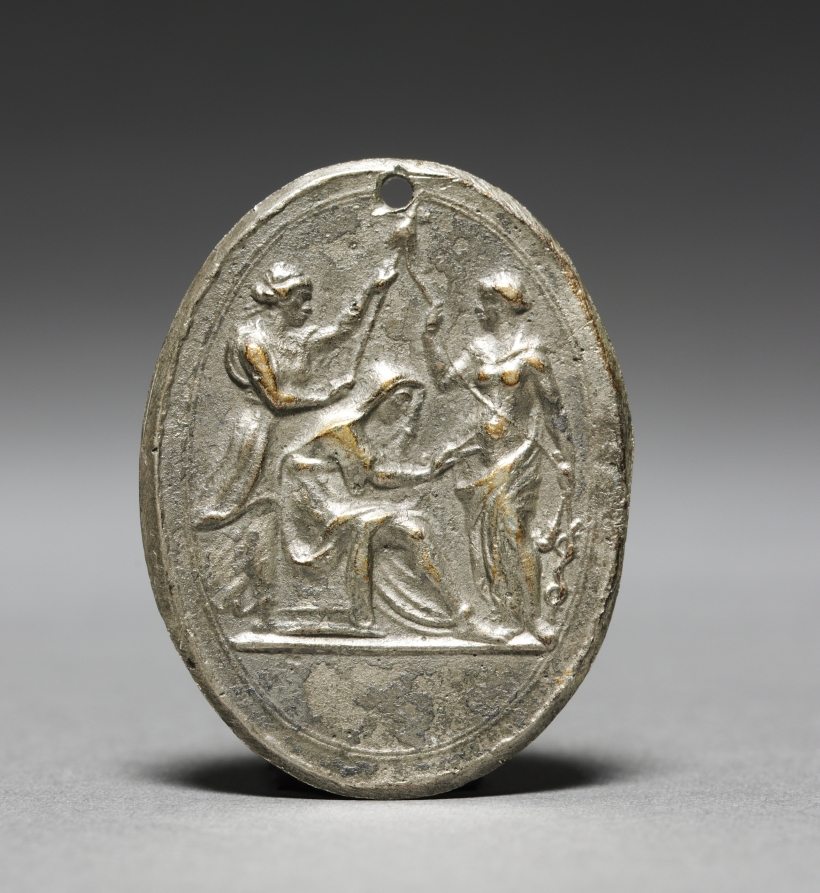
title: The Three Fates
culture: Italy, 16th century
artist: cast after a model by Valerio Belli (Italian, c. 1468–1546)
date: early 1500s or later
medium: silver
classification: Sculpture